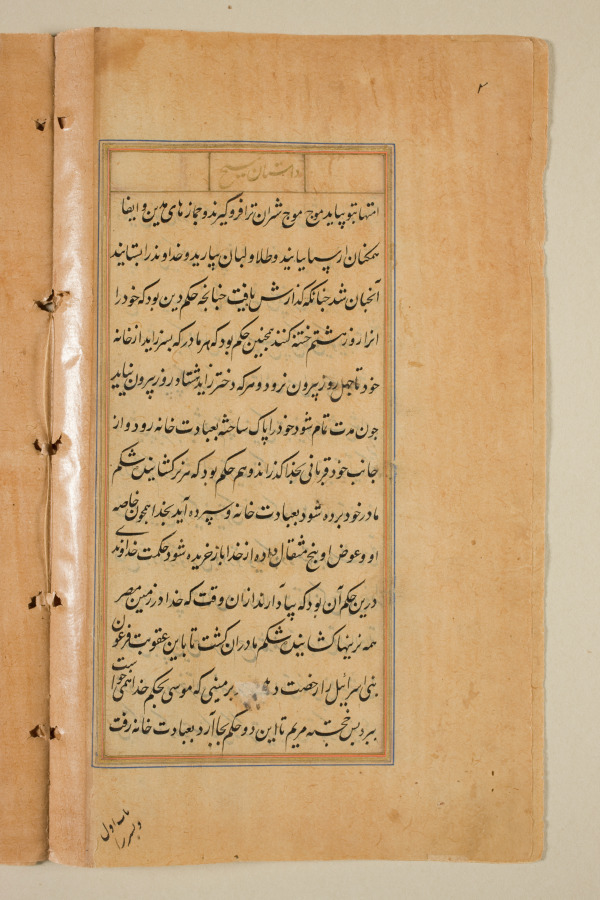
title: Text page from a Mirror of Holiness (Mir’at al-quds) of Father Jerome Xavier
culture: Mughal India, Allahabad, made for Prince Salim (1569–1627)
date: 1602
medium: Ink and gold on paper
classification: Manuscript